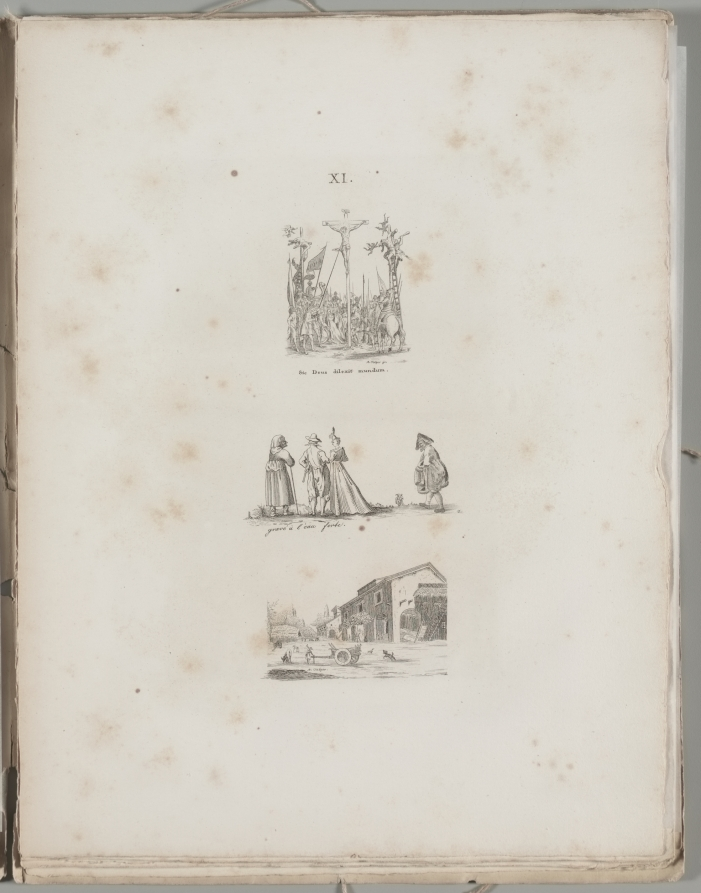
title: Art of the Lithograph: Three Engraving Examples, Plate XI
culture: Germany, 19th century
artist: Alois Senefelder (German, 1771–1834)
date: 1819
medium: lithograph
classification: Portfolio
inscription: On plate: lower: A Falger gr: Sic Deus dilexit mundum (God so loved the world)